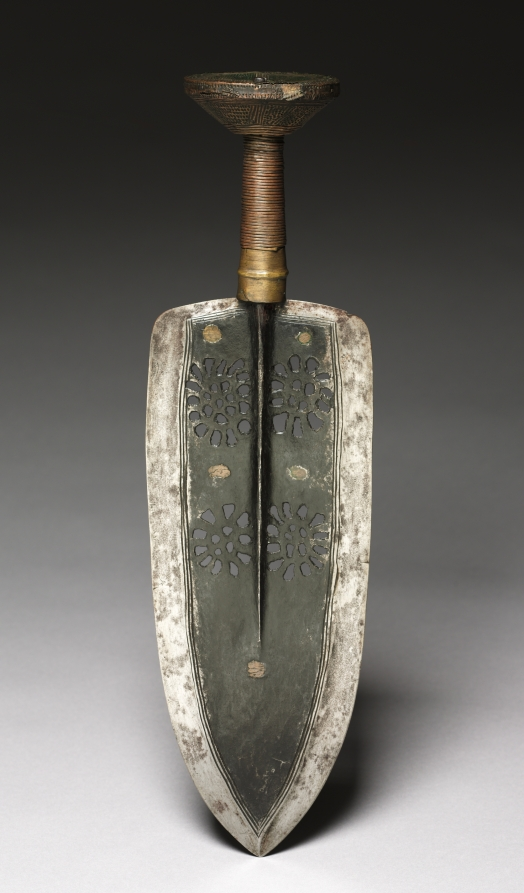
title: Dagger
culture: Africa, Central Africa, Democratic Republic of Congo, 19th century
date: 1800s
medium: Iron, wood, and copper alloy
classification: Arms and Armor